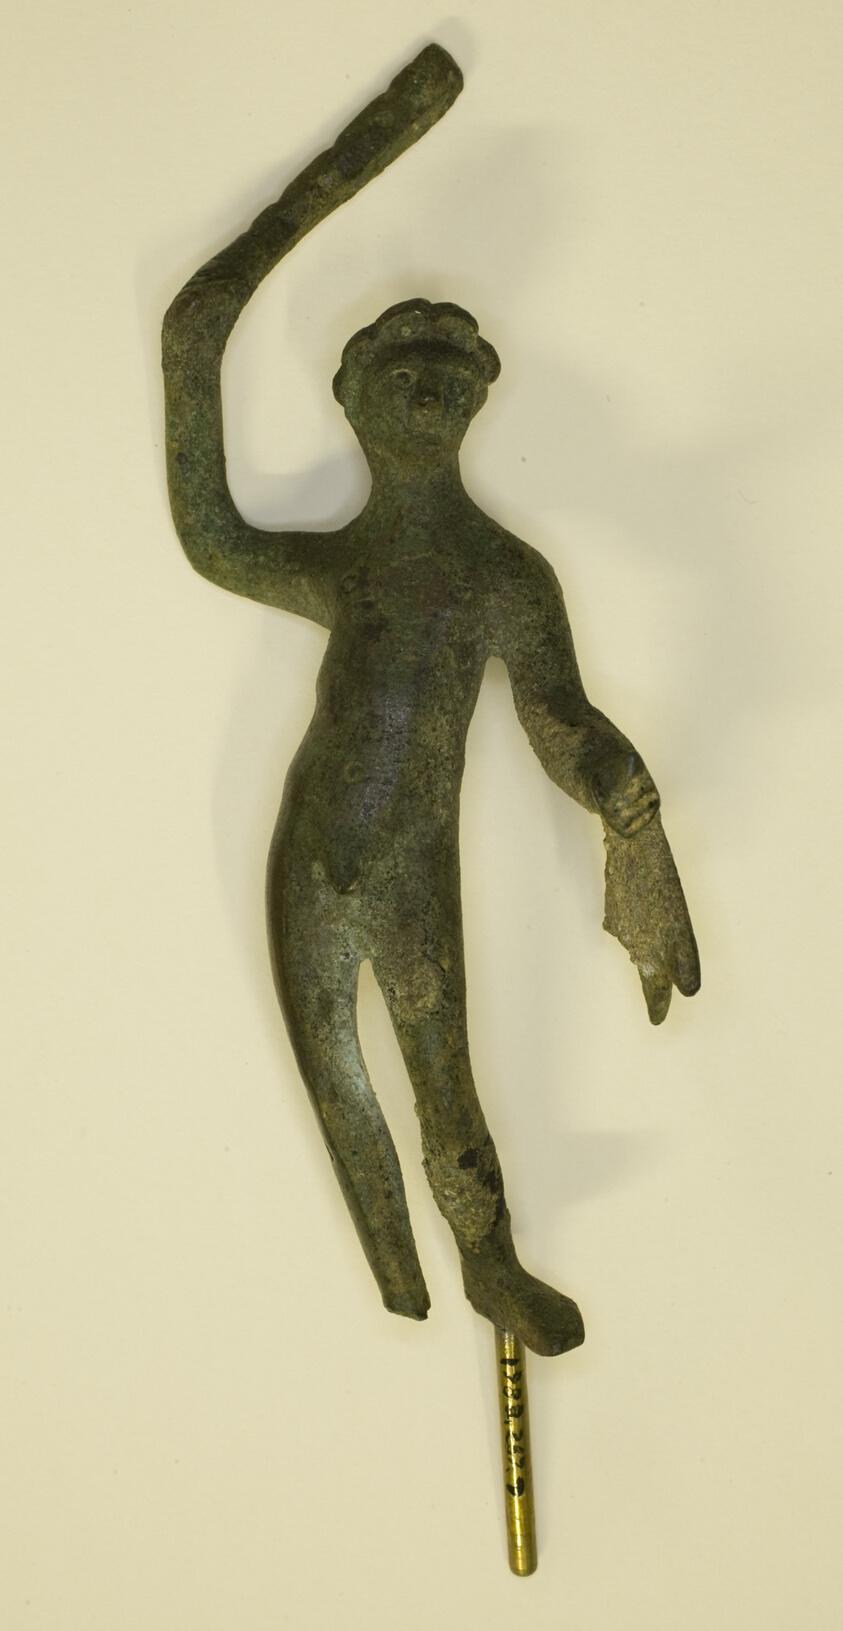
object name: Sculpture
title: Statuette of Herakles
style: etruscan, ancient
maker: Etruscan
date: 4th-3rd century BCE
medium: Bronze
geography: Etruria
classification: statuette; bronze; metal; sculpture; ancient art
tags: Heracles